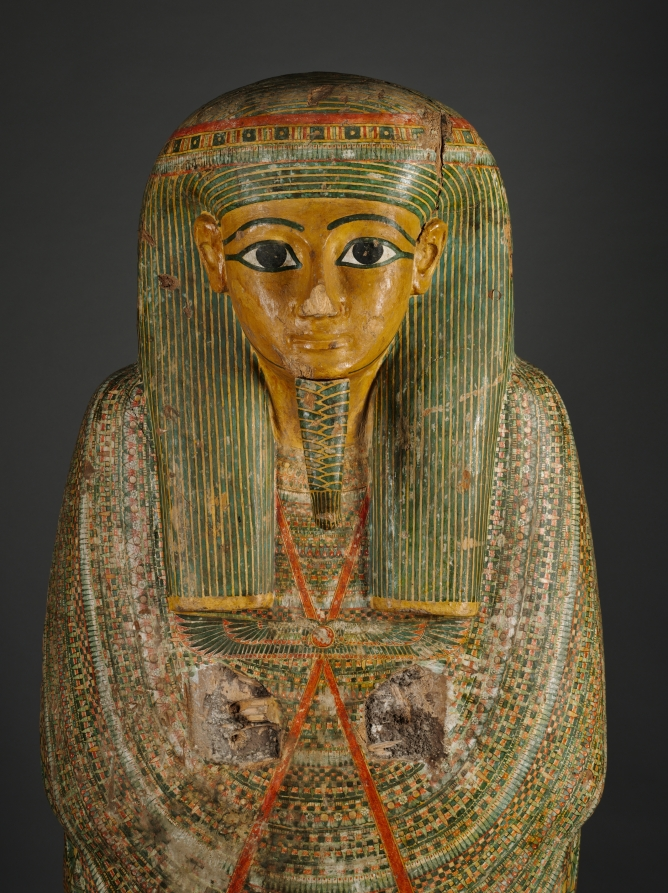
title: Coffin of Bakenmut (lid)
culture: Egypt, Thebes, Third Intermediate (1069–715 BCE), Dynasties 21–22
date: c. 1000–900 BCE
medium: gessoed and painted sycamore fig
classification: Funerary Equipment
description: The coffin of Bakenmut is one of the finest examples of painted wooden coffins made for the priests of Amen and their families at Thebes during Dynasty 21 and early Dynasty 22. The pharaohs of this time were no longer buried in the Valley of the Kings, but instead built tombs in the Delta, far to the north, where they resided. Security was lax in the Theban necropolis. The coffins and funerary goods of the wealthy citizens of Thebes were placed in unmarked and undecorated family tombs cut into the cliffs on the west bank of the Nile. All the care and detail that in more prosperous times were devoted to the decoration of the tomb chapel were now lavished on the elaborately painted coffins. Every available surface is crowded with religious scenes, images of funerary gods and goddesses, protective spells, and magical symbols. The deceased appears mummiform. An elaborate floral collar entirely covers the upper body, exposing only the separately attached hands (now lost). A pair of red "mummy braces" are crossed over the chest, their point of intersection marked by a winged sun disk. The lower body is covered with tiny figures modeled in gesso against a yellow background, which gives the effect of gold inlaid with glass or semiprecious stone. The decoration on the interior features two deified dead kings of Dynasty 18. Although these rulers had lived centuries before, memory of their greatness was still very much alive. The main scene near the top depicts Tuthmosis III, the great military pharaoh, who lived 500 years before Bakenmut. Posed as a mummy, the ruler wears a brilliant feathered garment enfolding him with falcon’s wings. The scene below features back-to-back seated images of Amenhotep I, regarded as the patron of the Theban cemetery and worshiped as a local god there.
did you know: Originally another smaller coffin was placed inside this outer coffin and in that the deceased with a mummy board would have rested.